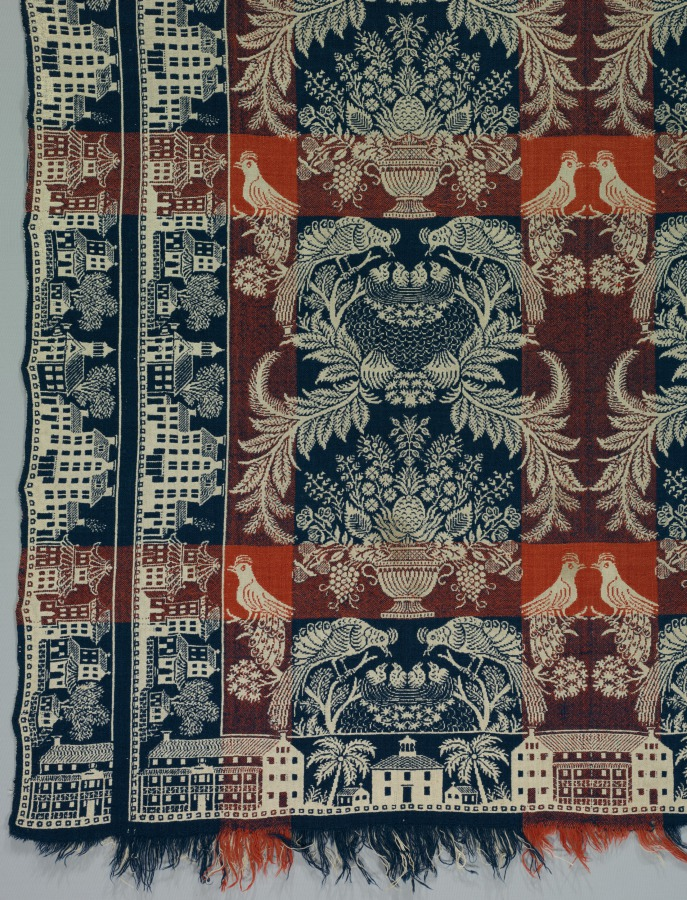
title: Coverlet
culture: America, Ohio, Steubenville, 19th century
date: c. 1820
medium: tabby, double cloth weave, two lengths: wool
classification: Textile